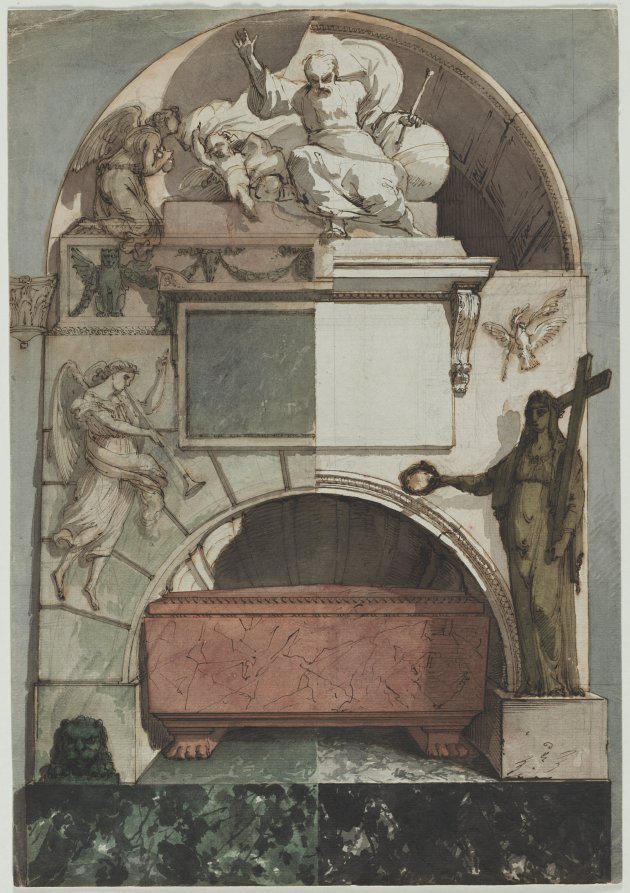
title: Design for a Fresco of an Artist's Tomb in the Certosa of Bologna (recto)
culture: Italy, 19th century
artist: Pietro Fancelli (Italian, 1764–1850)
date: c. 1810–1820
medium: pen and brown ink and watercolor with graphite under drawing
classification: Drawing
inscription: Verso, upper right, in graphite: "316" verso, in graphite: "20 Fancelli (?) 8/1000"